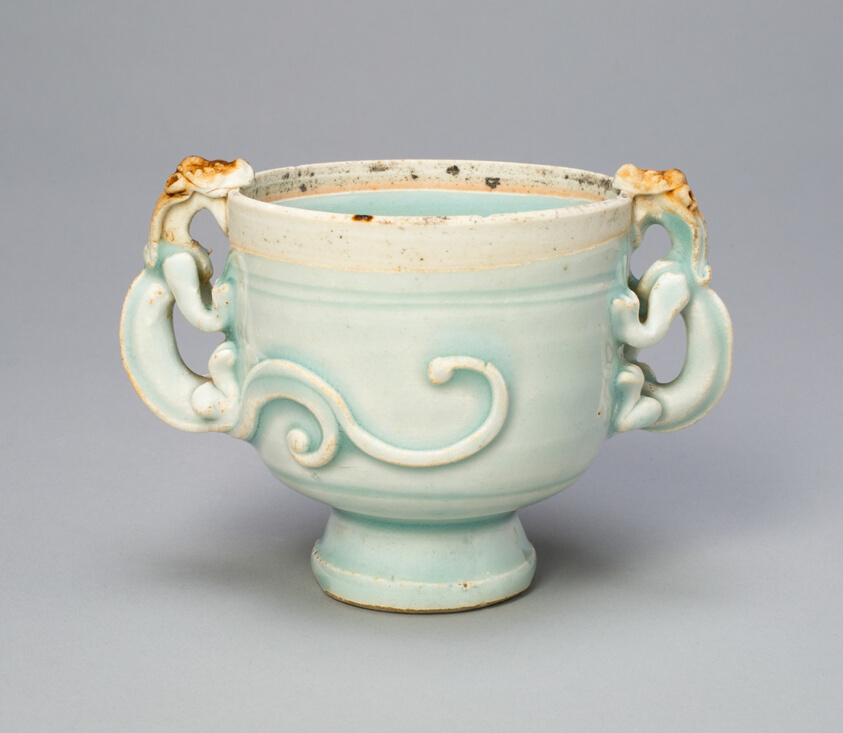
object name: Vessel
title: Double-Handled Cup with Handles in the Form of Chi (Hornless) Dragons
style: Chinese (culture or style)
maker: China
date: Southern Song (1127–1279) or Yuan dynasty (1279–1368), 13th century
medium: Qingbai ware with molded and applied decoration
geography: China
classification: drinking vessel; vessel